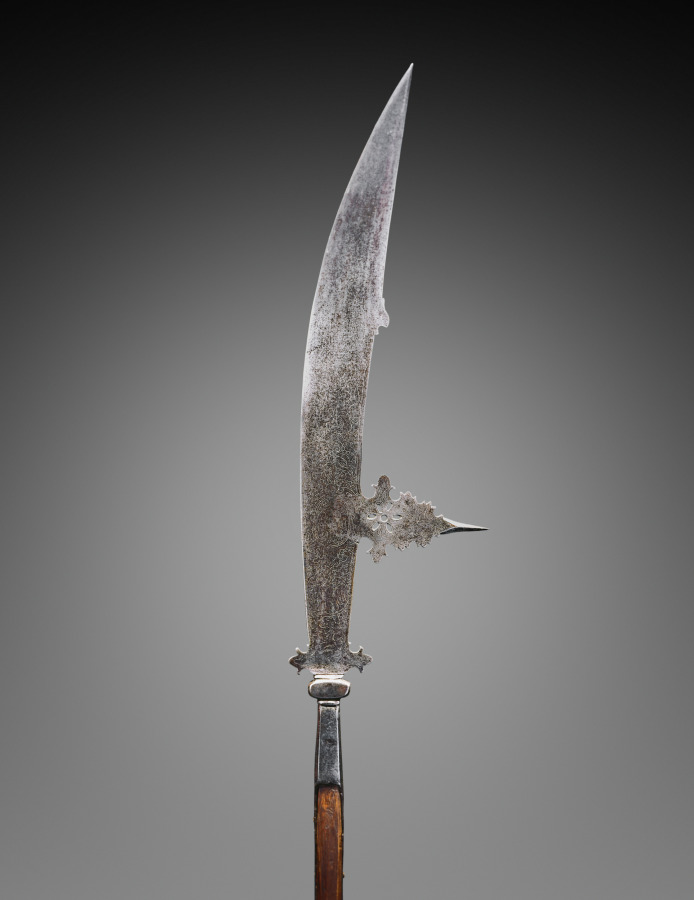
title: Glaive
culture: Italy, Venice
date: c. 1600–20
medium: steel, etched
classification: Arms and Armor